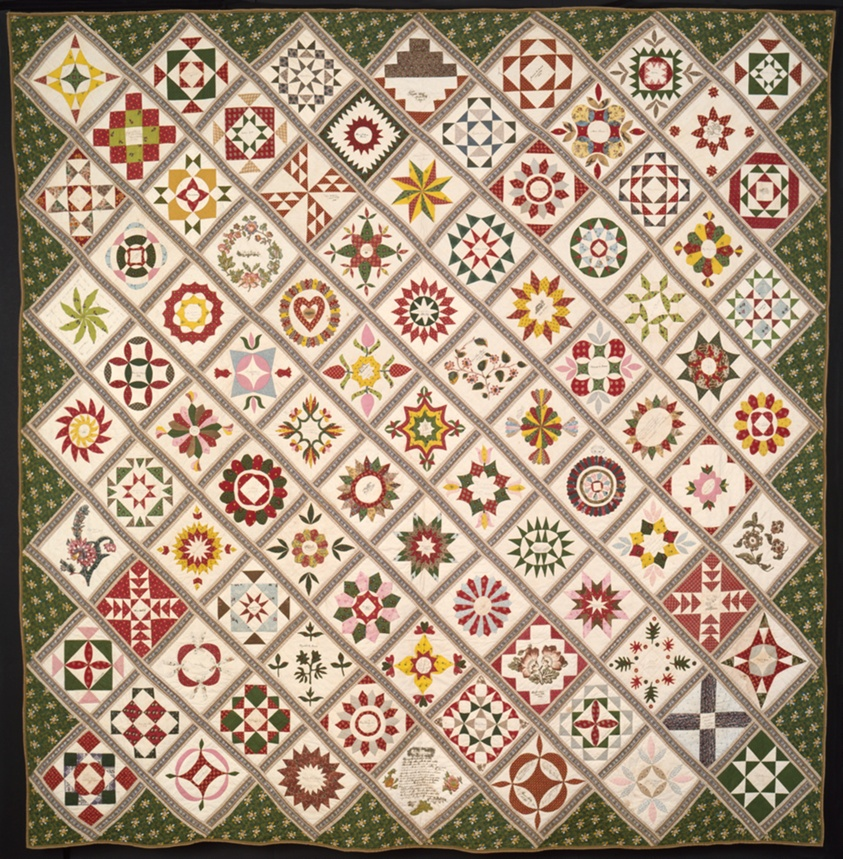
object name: Textile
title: Friendship Quilt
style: 19th century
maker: Made for Ella Maria Deacon (American, 1811–94); Mount Holly, New Jersey, United States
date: 1842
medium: Appliquéd and pieced quilt; dyed and printed plain weave cotton fabrics; ink inscriptions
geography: New Jersey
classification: needlework - quilt; textile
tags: friendship, circles, triangles, flowers, wreaths, stars, squares, geometric motif, floral motifs